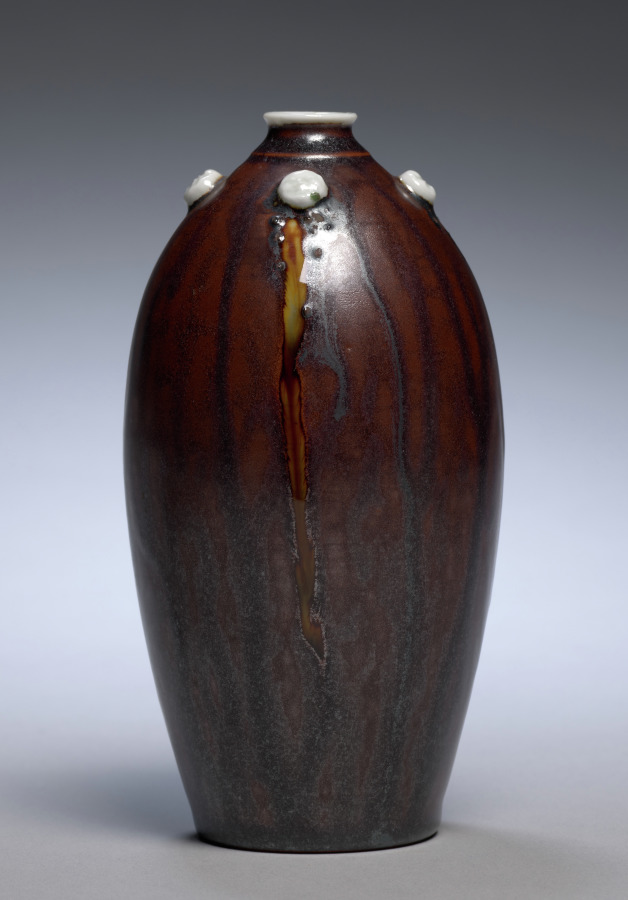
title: Vase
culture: France, 20th century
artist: Sèvres Porcelain Factory (French, est. 1756)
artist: Taxile Maximin Doat (French, 1851–1939)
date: 1901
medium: porcelain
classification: Ceramic